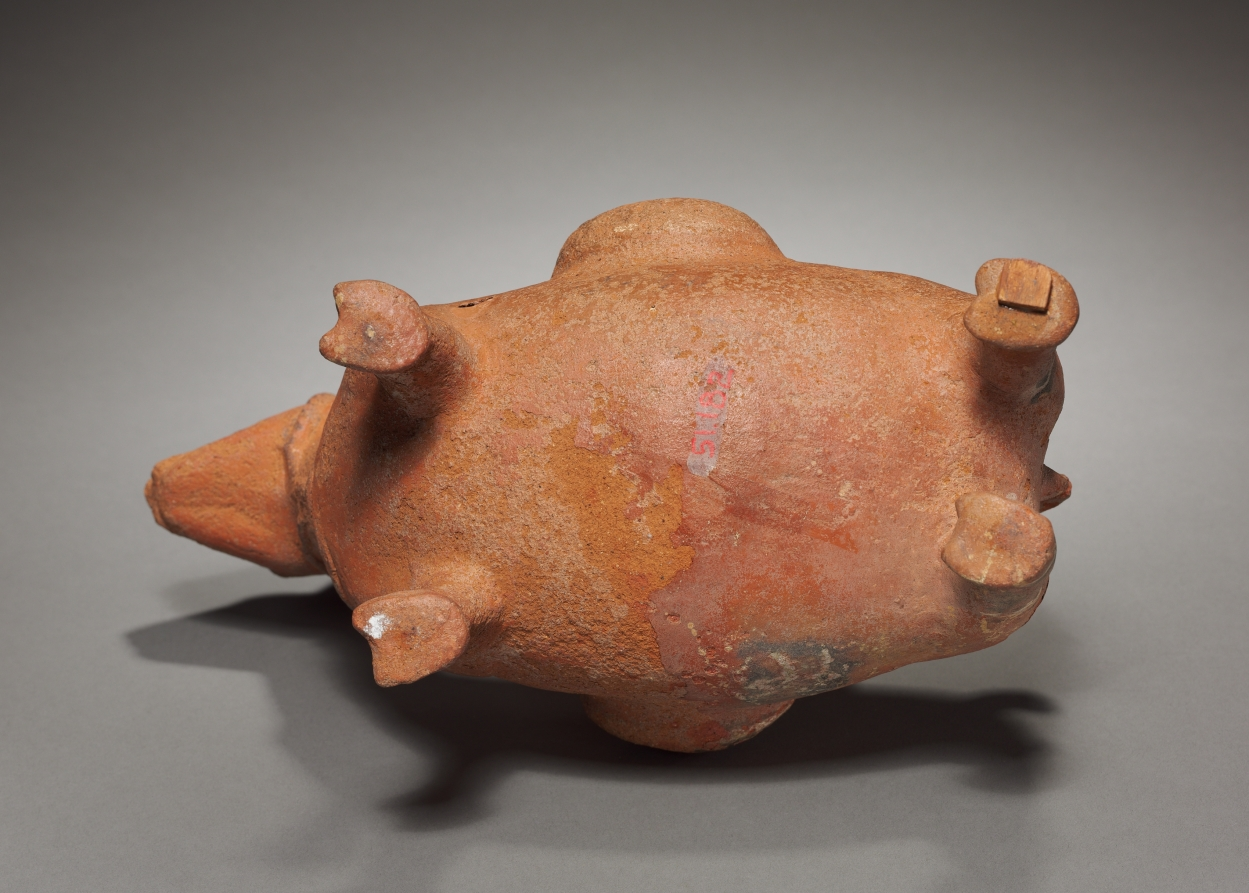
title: Llama with Packs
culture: Peru, Chimú or Inca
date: before 1532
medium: pottery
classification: Ceramic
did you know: The llama was the only burden-bearing animal, aside from humans, in ancient South America.